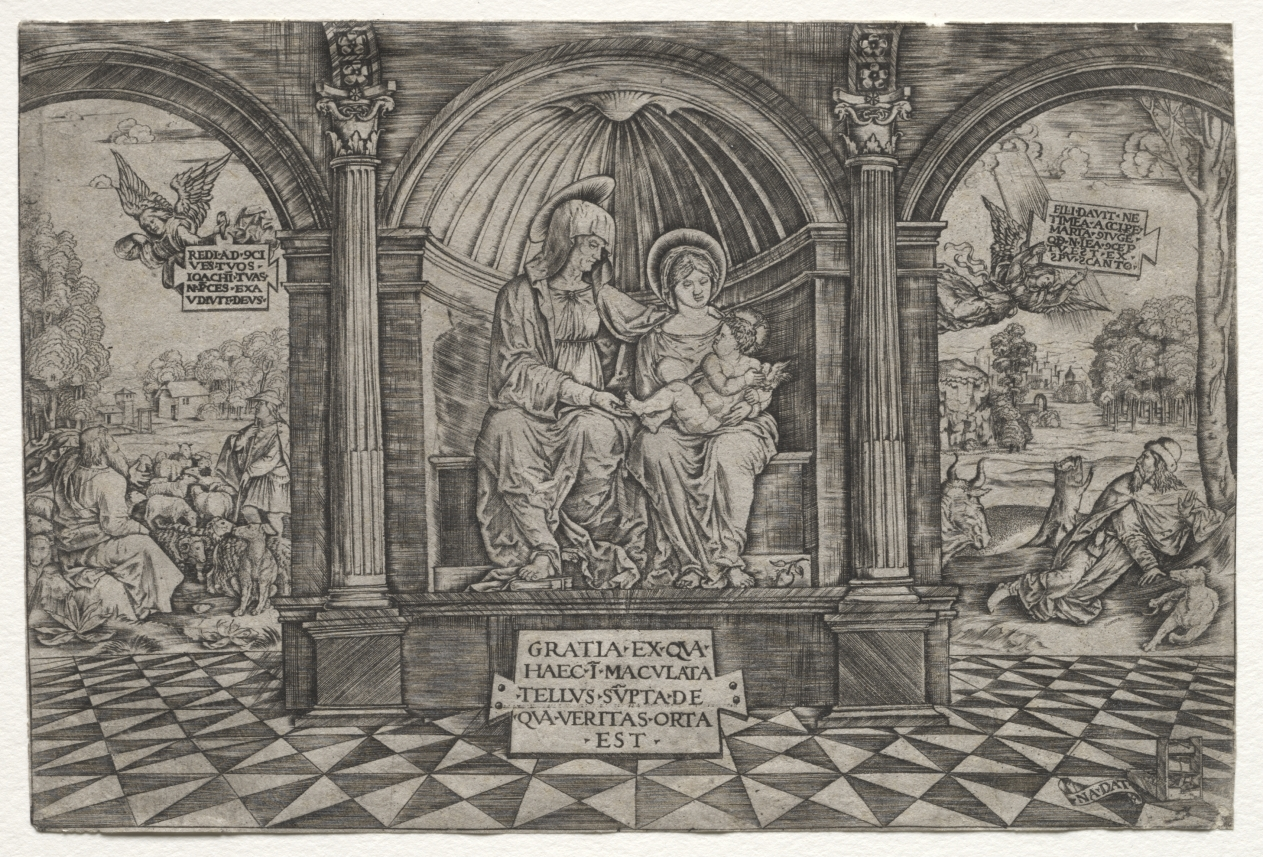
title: The Virgin and St. Anne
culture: Italy, 16th century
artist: Master Na Dat with the Mousetrap (Italian)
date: c. 1512–13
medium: engraving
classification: Print